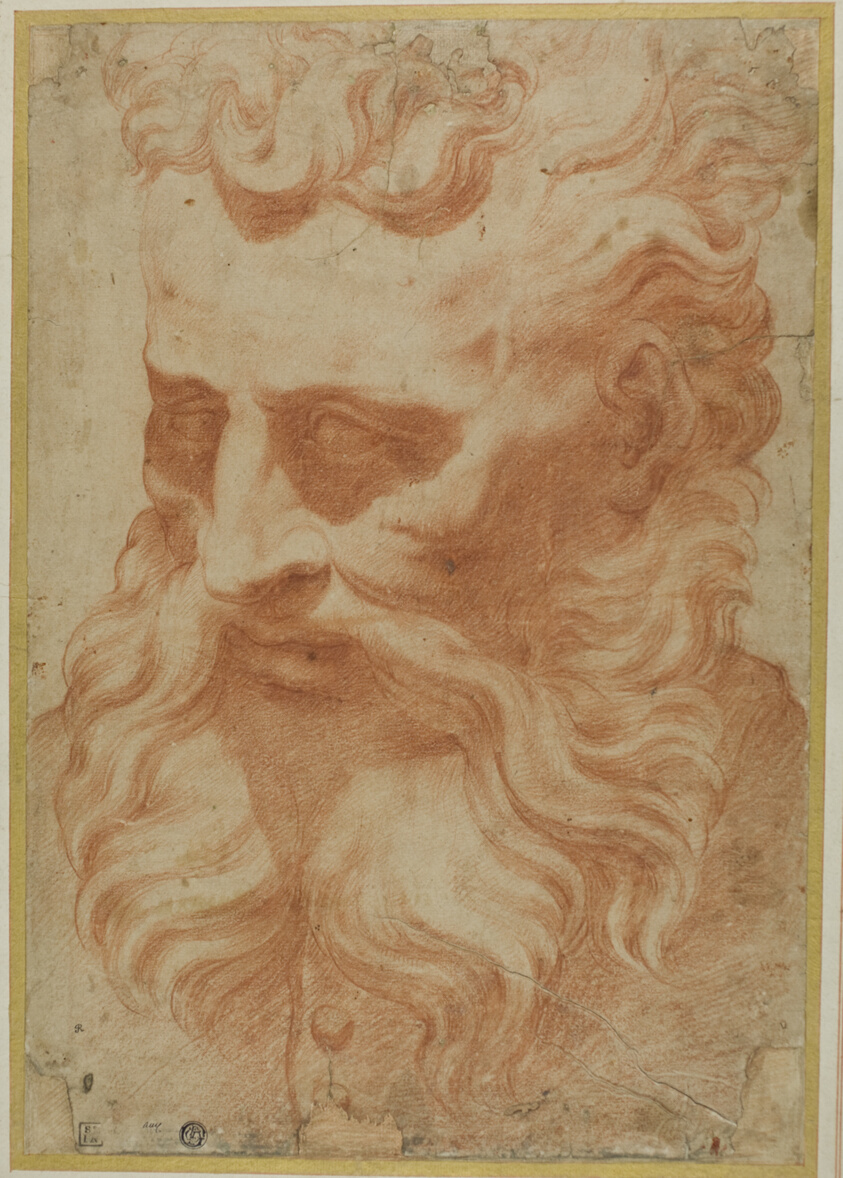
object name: Drawing and Watercolor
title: Head of God the Father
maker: Attributed to Daniele Ricciarelli, called Daniele da Volterra; Italian, 1509-1566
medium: Red chalk on ivory laid paper, laid down on board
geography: Italy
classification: chalk; drawings (visual works); prints and drawing